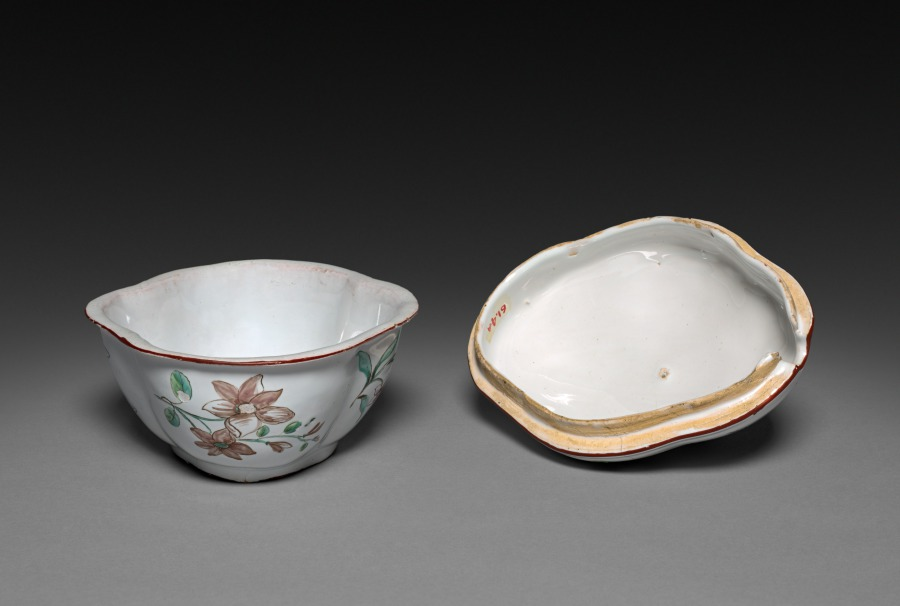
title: Sugar Basin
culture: France, 18th century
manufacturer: Sceaux Factory (French, active 1748–66)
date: c. 1750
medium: faience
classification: Ceramic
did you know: In medieval Italian churches, painted altarpieces served as a focal point for worshippers during the rituals of faith. The figures of Jesus, Mary, and eight saints are framed by a golden background that would have glistened in the flickering candlelight of the church.